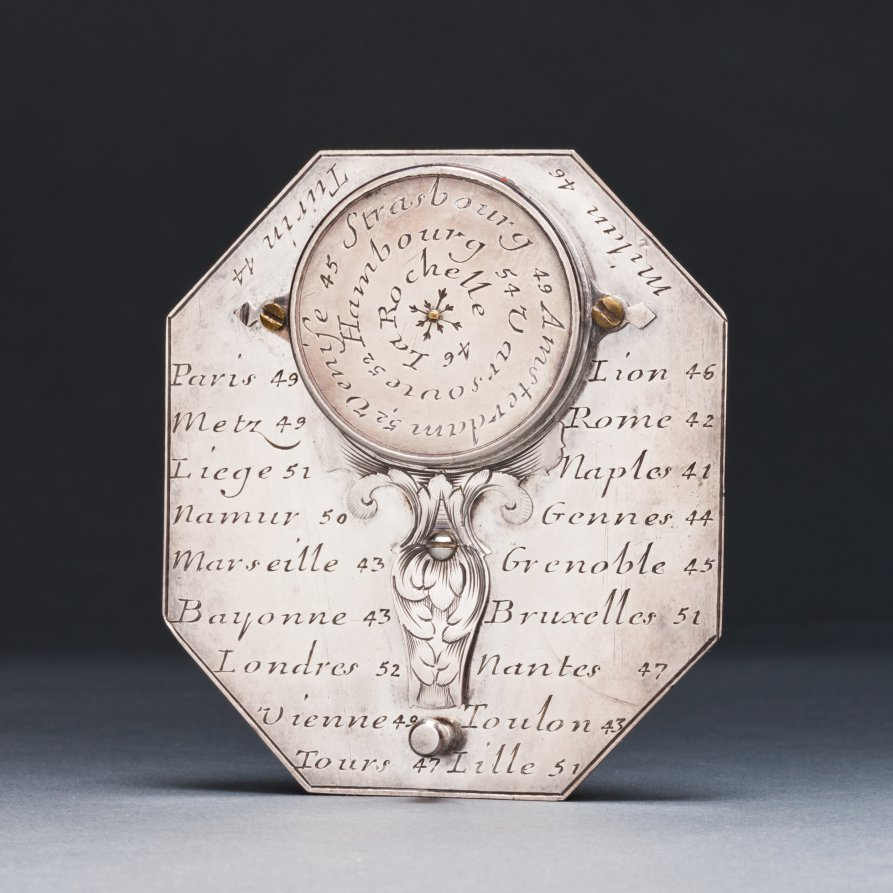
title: Butterfield Sundial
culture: France, 18th century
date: 1700s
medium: silver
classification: Silver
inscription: [Engraved signature above the compass in ribbon band]: "N. BION A Paris"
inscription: [Engraved on the face of the sundial]: “Pour 55° 4-5-6-7-8-9-10-11 50° IIII-V-VI-VII-VIII-IX-X-XI 45° 5-6-7-8-9-10-11 40° -VI-VII-VIII-IX-X-XI'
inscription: [Engraved on the other side]: "Pour 55° -8-7-6-5-4-3-2-1-0 50°-VIII-VII-VI-V-IIII-III-II-I 45°-8-7-6-5-4-3-2-1 40°-VII-VI-V-IIII-III-II-I"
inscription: [Engraved around the compass]: “NORD-OUEST-SUD-EST”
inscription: [Engraved on the back of the sundial]: “Turin 44 Milan 46 Paris 49 Lion 46 Metz 49 Rome 42 Liege 51 Naples 44 Namur 50 Gennes 44 Marseille 43 Grenoble 45 Bayonne 43 Bruxelle 51 Londres 52 Nantes 47 Vienne 48 Toulon 43 Tours 47 Lille 51”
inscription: [Engraved around the back of the compass]: “Venise 45 Strasbourg 49 Amsterdam 52 Hambourg 54 Varsovie 52 La Rochelle 46”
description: Butterfield-type sundials are characterized by their adjustable gnomons, metal flaps that cast a shadow on the dial’s face to indicate the hour, and geographical indices. This sundial has a scale adjustable between latitudes of 40° to 60° north. The latitudes of 26 European towns are engraved on its back for quick reference. With an intricately engraved silver face, it would have functioned as a fashionable traveler’s accessory.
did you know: Butterfield-style sundials were named after Micheal Butterfield, an English scientific and mathematical instrument maker who worked in Paris between 1674 and 1724.